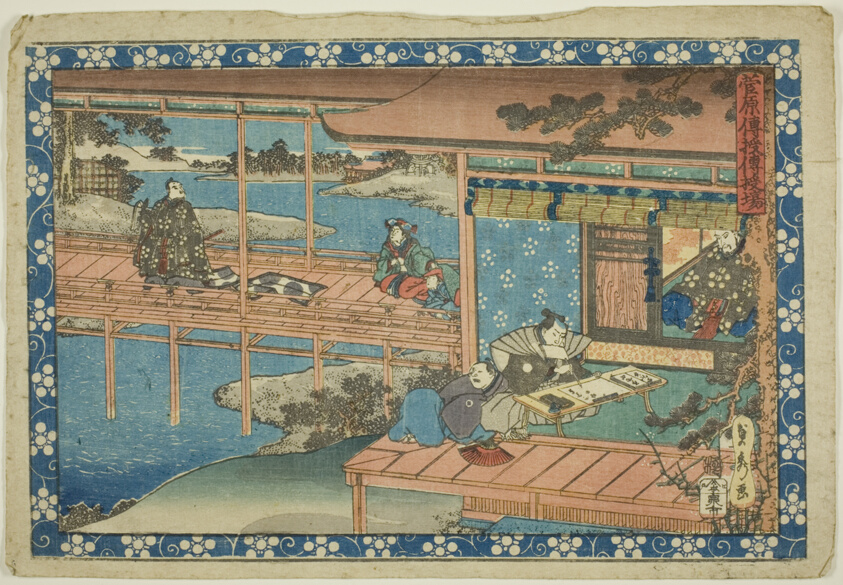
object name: Print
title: The Transmission Scene (Denjuba), from the series "Sugawara's Secrets (Sugawara denju)"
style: Japanese (culture or style)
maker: Utagawa Sadahide (Japanese, 1807-1873)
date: c. 1830/44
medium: Color woodblock print; oban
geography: Japan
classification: print; asian art